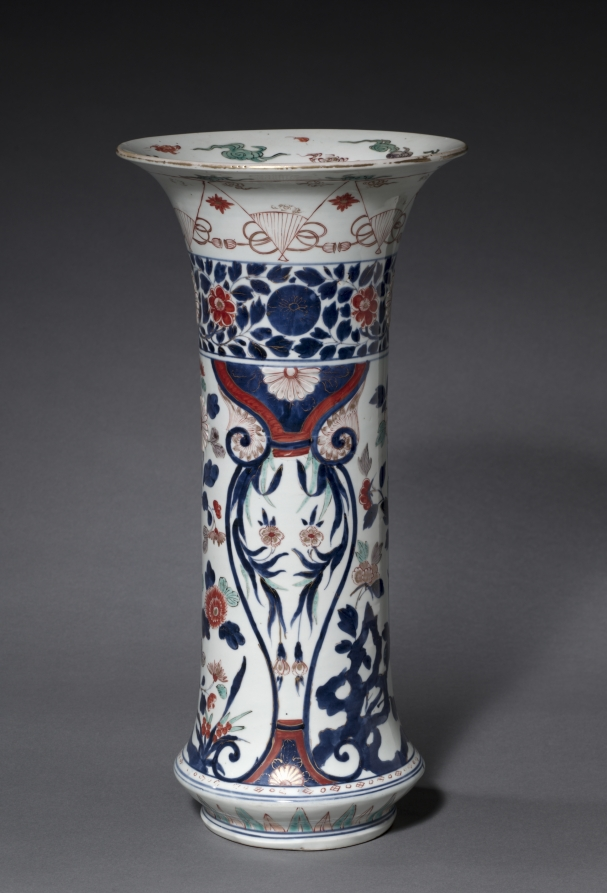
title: Vase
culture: Japan, Edo period (1615–1868)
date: 1600s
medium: porcelain with decoration in underglaze blue and colored enamels (Hizen ware, Arita type, Imari style)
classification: Ceramic